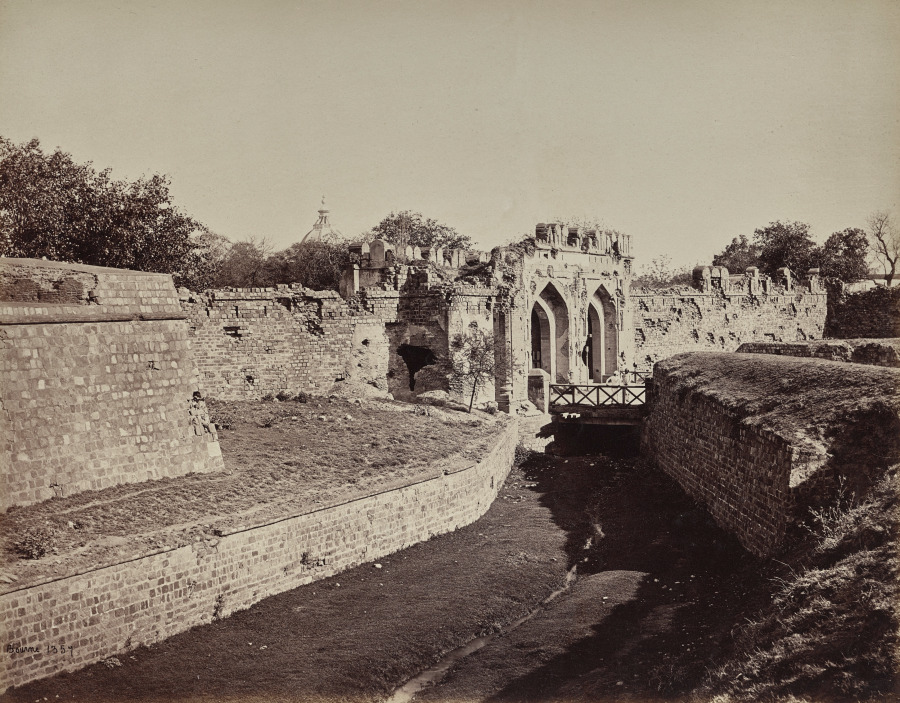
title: Delhi. The Kashmire Gate. The Scene of Some Very Hard Fighting in 1857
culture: England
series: Photographs of Northern India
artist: Samuel Bourne (British, 1834–1912)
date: 1863–70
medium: albumen print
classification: Photograph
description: The 50 images in this album, all taken in the 1860s, move from the hill towns of the Himalayas down to cities including Lahore (now in Pakistan), Delhi, Lucknow, Agra, Benares (now Varansi), and Calcutta (now Kolkata). Architectural studies of major monuments offer valuable historical records of what sites such as the Taj Mahal and the imperial mosque of the Mughal emperors in Delhi looked like before 20th-century restorations.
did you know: Samuel Bourne, the author of most the images in this album, was a banker in England before he moved to India to become a professional photographer.